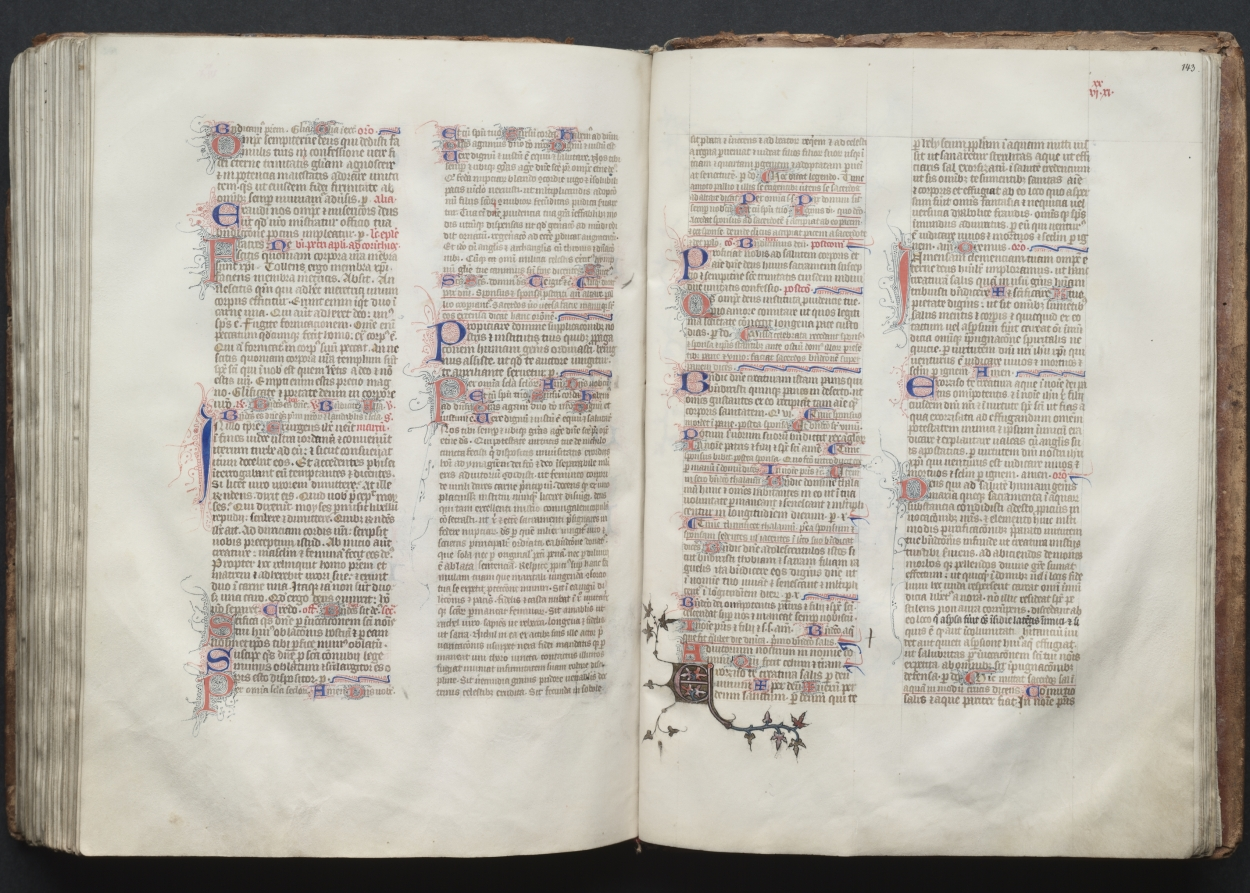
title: The Gotha Missal: Fol. 142v, Text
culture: France, Paris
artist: Master of the Boqueteaux (French)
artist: and Workshop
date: c. 1375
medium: ink, tempera, and gold on vellum; blind-tooled leather binding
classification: Bound Volume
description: The style and quality of this manuscript's decoration is typical of deluxe Parisian books made for aristocratic or royal patrons. Most of the book's decoration appears to be the work of the Master of the Boqueteaux, an artist active at the court of King Charles V (died 1380). His style was apparently shared by a number of book illuminators working in and around Paris. It is very possible that the Gotha Missal belonged to Charles V, but is not provable because the manuscript has no royal portraits and lacks a colophon. Given the book's magnificent decoration, however, it would seem that it was produced for a Valois prince, if not for the king himself. The manuscript receives its name from the German dukes of Gotha, its later owners.